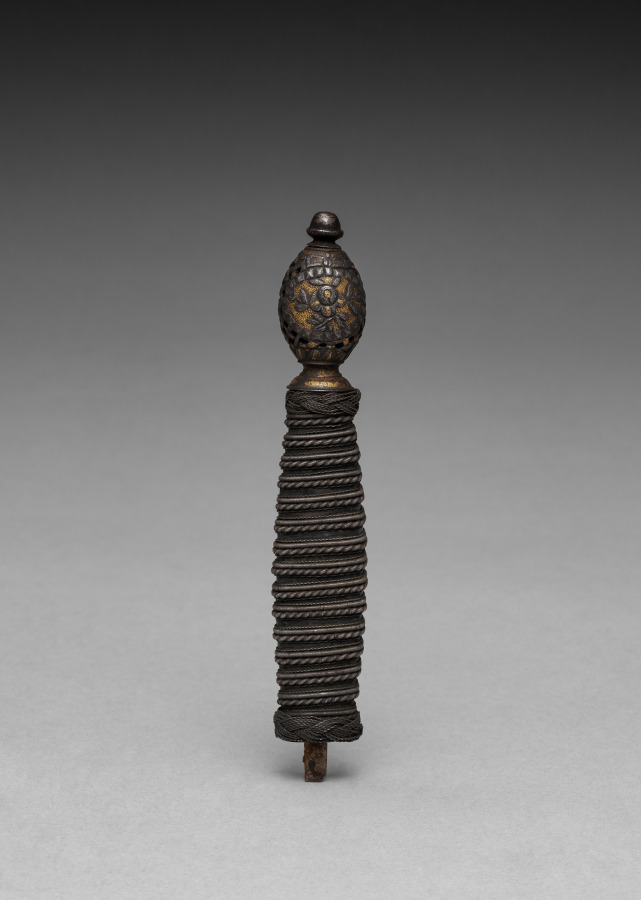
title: Court Sword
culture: France, late 18th century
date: late 1700s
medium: steel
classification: Arms and Armor